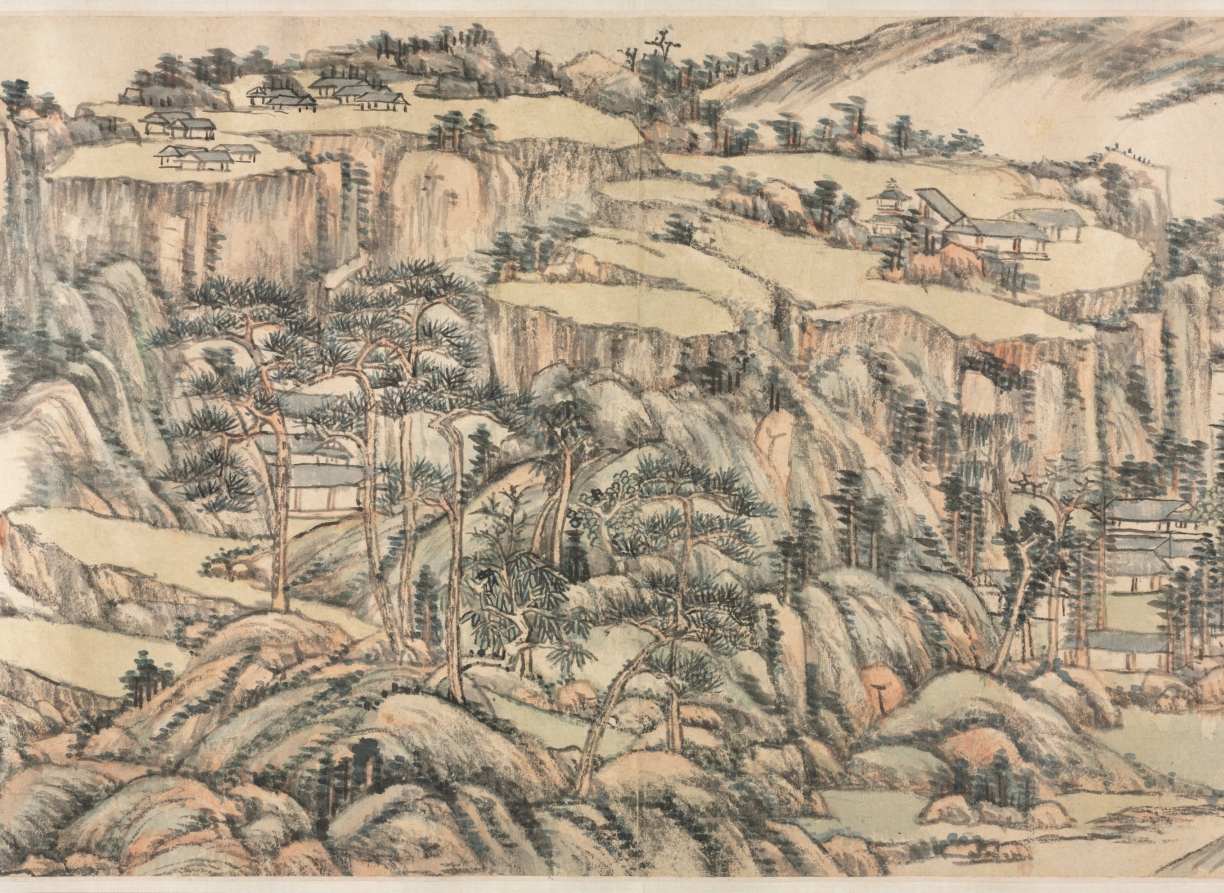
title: Green Peaks under Clear Sky: After Huang Gongwang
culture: China, Qing dynasty (1644-1911)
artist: Wang Yuanqi (Chinese, 1642–1715)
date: 1703–8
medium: handscroll; ink and light color on paper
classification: Painting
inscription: 晴巒霽翠：倣黃子久。麓臺。[印]石師道人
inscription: [印] 御書畫圖留與人看. 子久畫於宋諸大家荊、關、李、范、董、巨，無所不有。運筆不假修飾。皴法由淡入濃，化諸家之迹者也。澹明徐君偶見縮本，臨摹六幅。囑余參以富春大意，成一長卷。余夙夜在公，乘暇偶一點染。至戊子九秋告竣，閱四、五年矣。昔大癡為無用師作富春卷，七年而成，為千古鉅觀。今拙筆癡鈍。亦淹留至此。可為識者噴飯矣。王原祁題。[印]王原祁印; 麓臺 [印, 畫芯左下] 西廬後人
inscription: 3 additional colophons and 15 additional seals: 1 colophon and 9 seals of Yang Shicong 楊士驄 (b. 1870); 1 colophon of Wu Hufan 吳湖帆 (1894–1968); 1 colophon and 1 seal of Wu Mei (20th c.); 5 seals of Cheng Qi 程琦 (1911–1988).